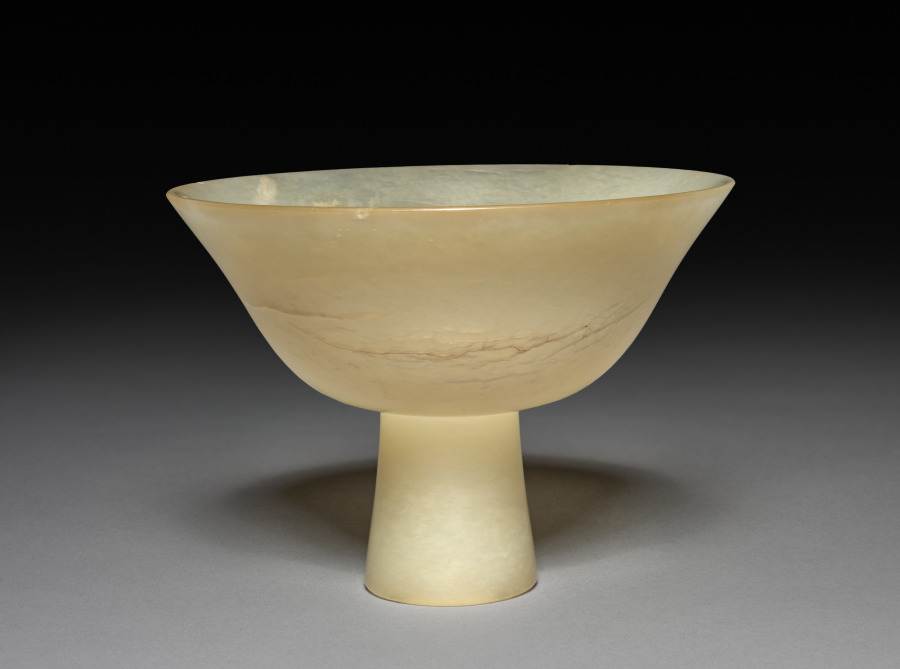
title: Stem Cup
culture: China, Ming dynasty (1368–1644)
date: 1368–1644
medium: white jade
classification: Jade